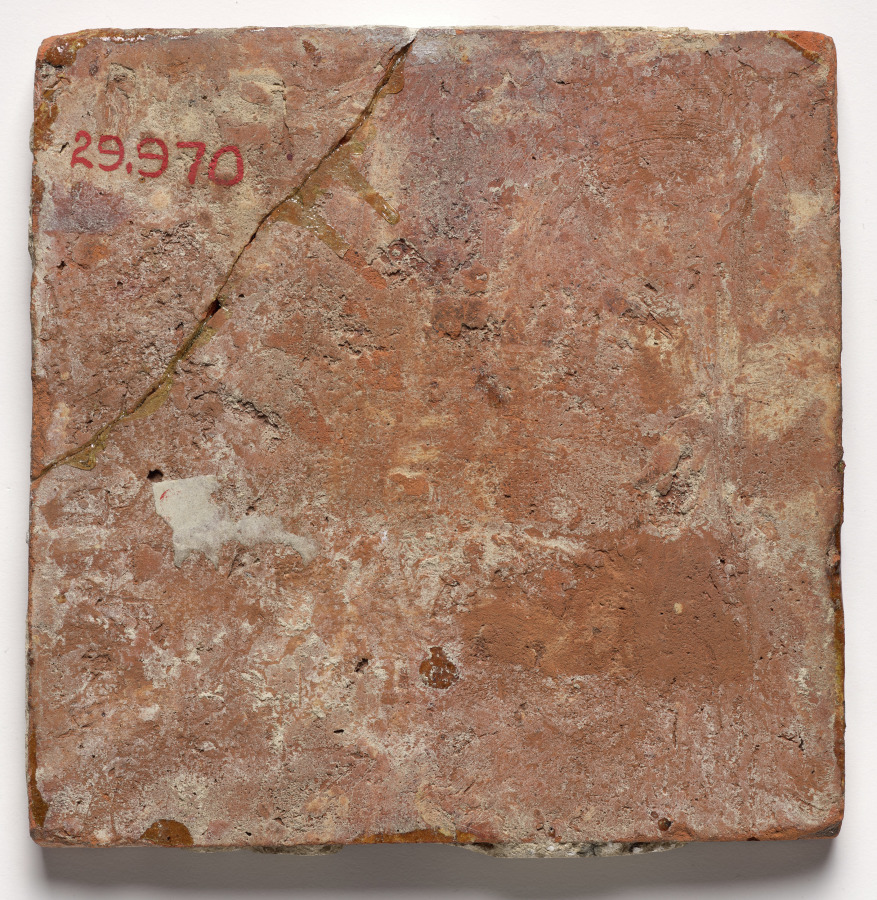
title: Tile- Rampant Lion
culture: Netherlands, Holland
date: c 1600s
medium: glazed ceramic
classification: Ceramic